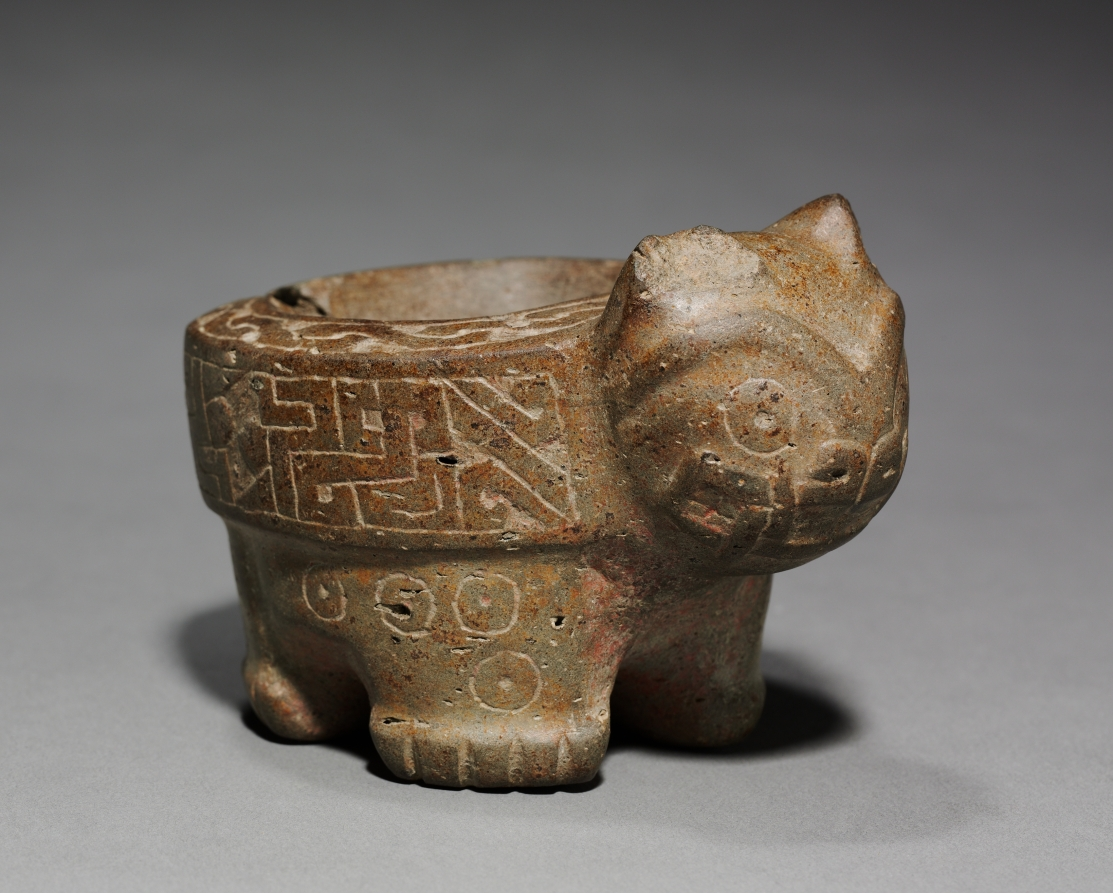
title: Feline Mortar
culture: Peru, North Highlands, Pacopampa(?), Chavín style (900-200 BCE)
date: 700–1 BCE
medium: stone, pigment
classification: Stone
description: Size suggests that this Chavín-style mortar was not used to grind bulky staples like corn, but instead pigments or plant hallucinogens used in religious rites to achieve spiritual insight and communion with cosmic forces. This may come from Pacopampa, a site in the northern highlands where elites adopted Chavín deities and worshiped them alongside local deities. These small sculptures illustrate the appeal and the spread of Chavín religion.